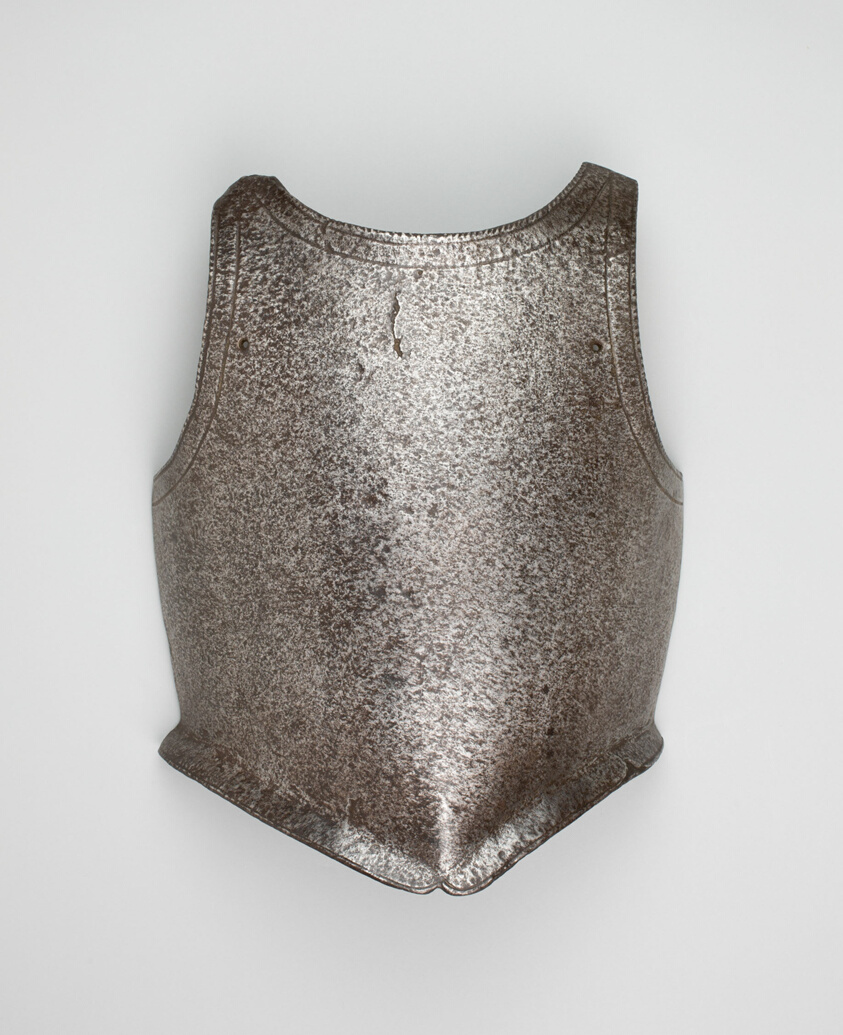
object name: Armor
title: Breastplate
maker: Italian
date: c. 1600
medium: Steel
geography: Italy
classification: suit-element; armor; arms and armor